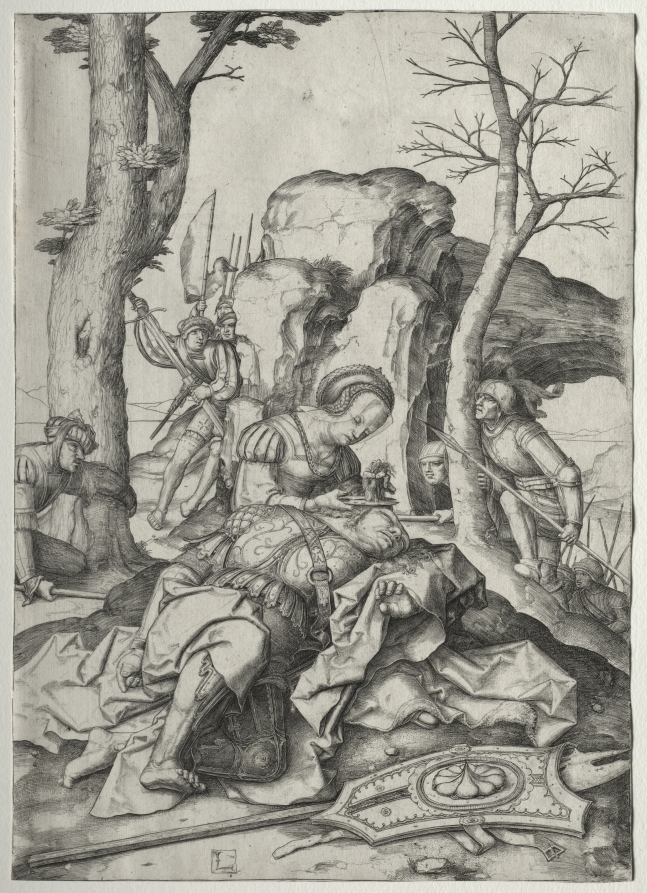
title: Samson and Delilah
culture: Netherlands, 16th century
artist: Lucas van Leyden (Netherlandish, 1494–about 1533)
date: c. 1507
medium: engraving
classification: Print